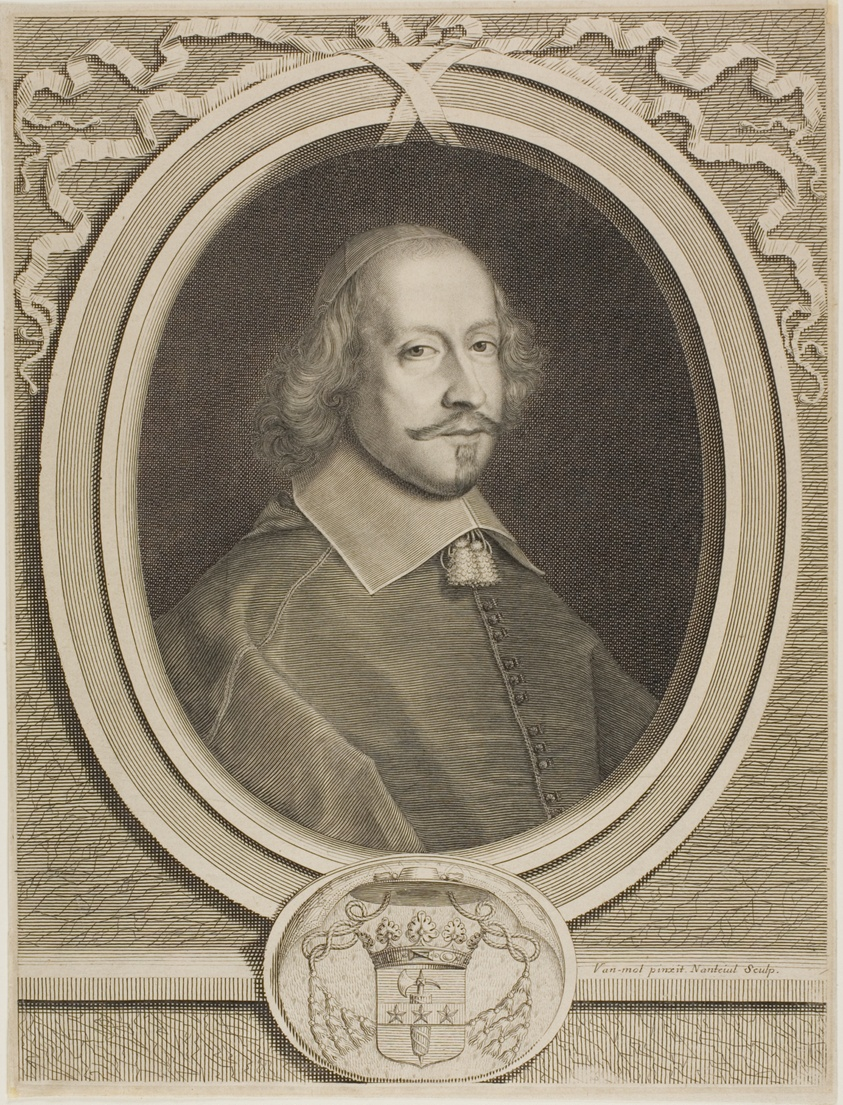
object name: Print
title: Cardinal Mazarin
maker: Robert Nanteuil (French, 1623-1678)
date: c. 1654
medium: Engraving on paper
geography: France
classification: engraving; print; prints and drawing